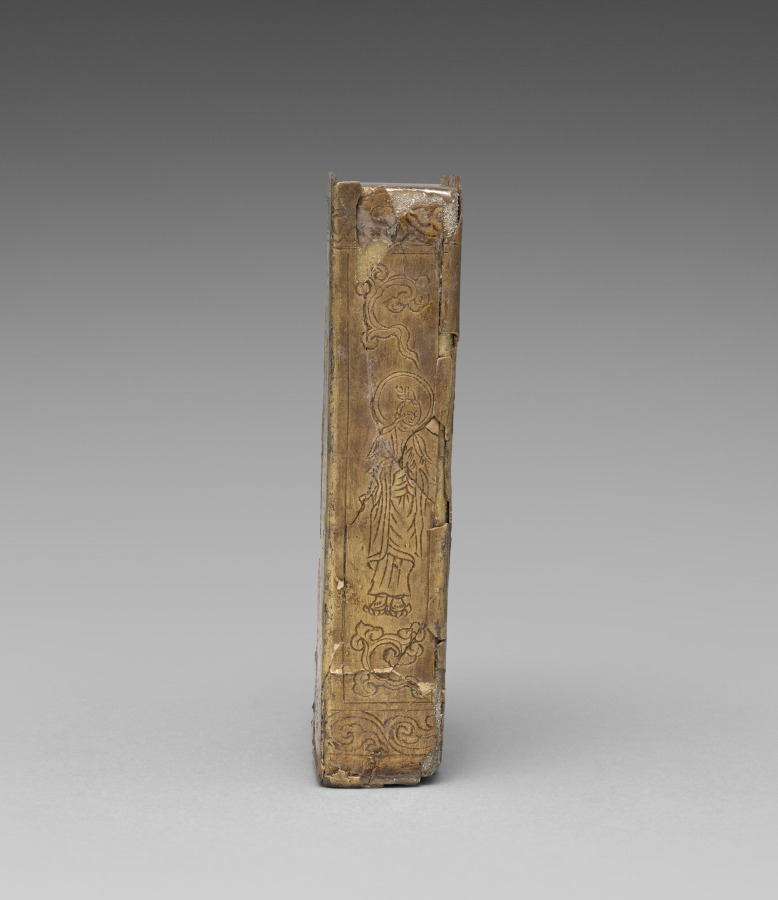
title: Buddhist Sutra Container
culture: Korea, Goryeo dynasty (918–1392)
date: 1100s-1200s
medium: gilt silver with incised Buddhist designs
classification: Metalwork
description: This container was designed to hold sutras, or Buddhist sacred texts. The Four Heavenly Kings, one for each of the cardinal directions, are incised on the exterior of the container. Images of the Four Heavenly Kings can often be found on Korean containers for sacred relics and sutras, and are symbolic of the wish to preserve the Buddha’s teachings.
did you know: This container was designed to hold a portable Buddhist sacred text.